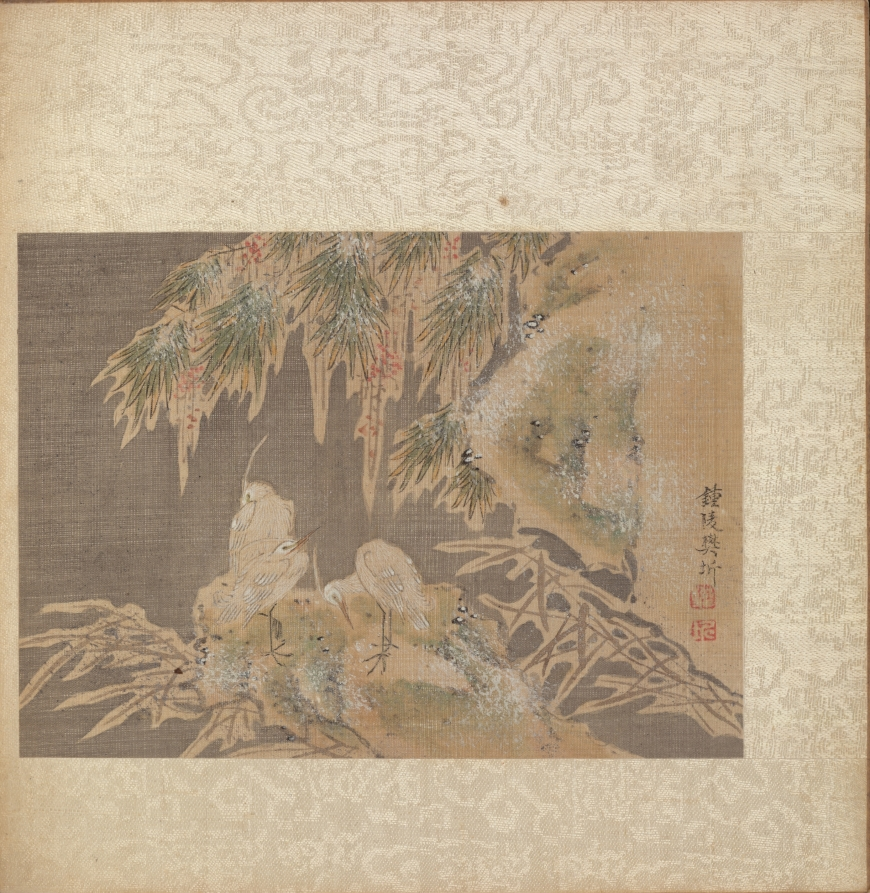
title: Album of Miscellaneous Subjects, Leaf 10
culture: China, Qing dynasty (1644-1911)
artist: Fan Qi (Chinese, 1616–after 1694)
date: early 1650s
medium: album leaf, ink and color on silk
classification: Painting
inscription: Artist's signature: Zhongling Fan Qi 鐘陵樊圻 ["Fan Qi of Zhongling" (Zhongling is another name for Nanjing.)]. Artist's seals: Fan Qi 樊圻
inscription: Poem by Zhou Yi 周儀 (mid 17th century–about 1705): Green bamboo stand alone with a snowy covering,/ In the deep recesses of a secluded valley, the evening breeze is light./ White egrets are lean as shadows with the cold ripples frozen,/ They enter the gorge not just to admire the fish.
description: Leaf 10 Zhou Yi's colophon reads: Green bamboos stand alone with a snowy covering, In the deep recesses of a secluded valley, the evening breeze is light. White egrets are lean as shadows with the cold ripples frozen, They enter the gorge not just to admire the fish.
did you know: Icicles encase the leaves and red berries of the Nandina domestica (Heavenly Bamboo).